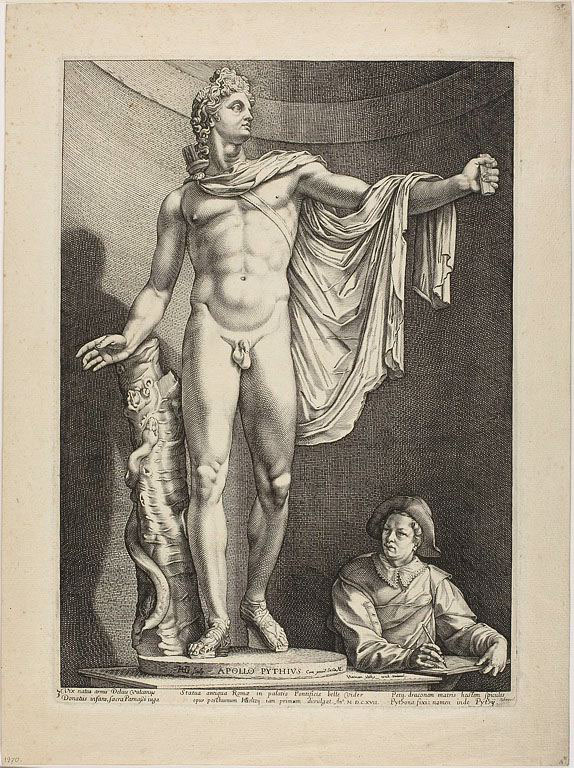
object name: Print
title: The Apollo Belvedere, plate 3 from Three Famous Antique Sculptures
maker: Hendrick Goltzius (Dutch, 1558-1617); text written by Theodorus Schrevelius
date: c. 1592, printed c. 1617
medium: Engraving in black on cream laid paper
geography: Netherlands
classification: engraving; print; prints and drawing